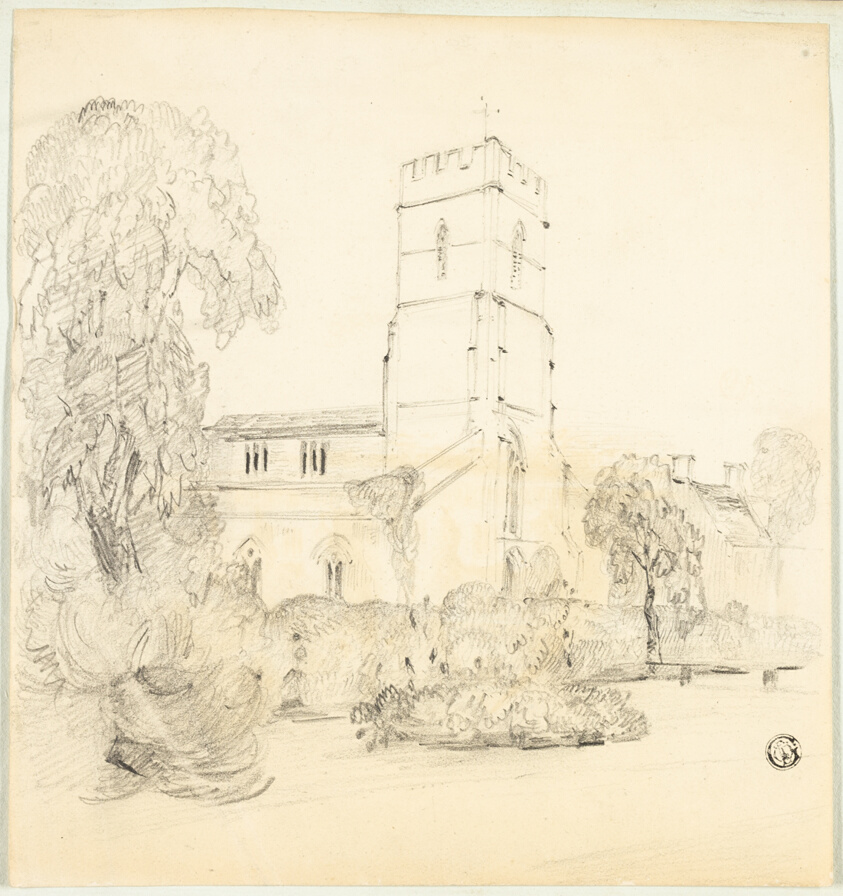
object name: Drawing and Watercolor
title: English Country Church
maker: Attributed to Edward Blore; English, 1787/89-1879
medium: Graphite on cream laid paper tipped onto light blue laid paper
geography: England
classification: graphite; drawings (visual works); prints and drawing